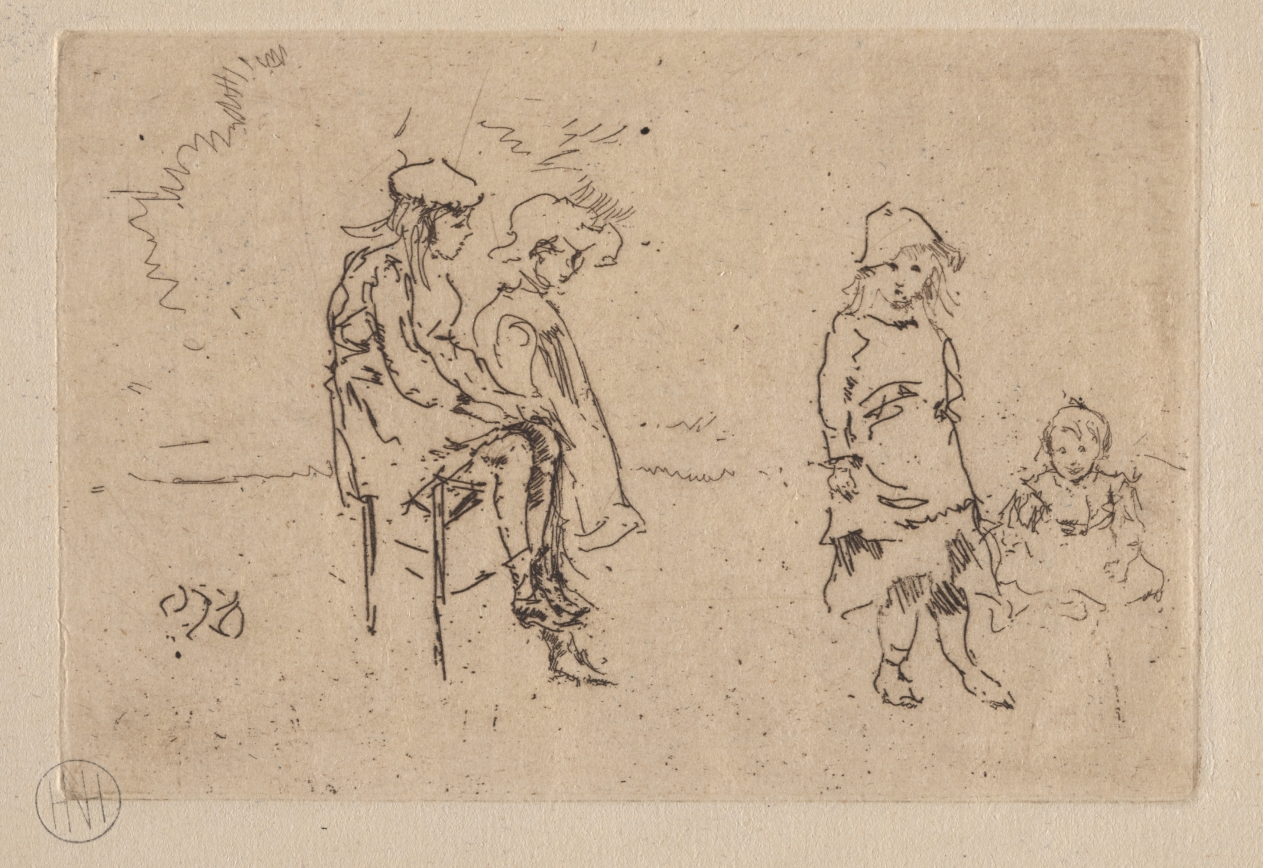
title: The Menpes Children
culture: America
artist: James McNeill Whistler (American, 1834–1903)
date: 1887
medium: etching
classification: Print